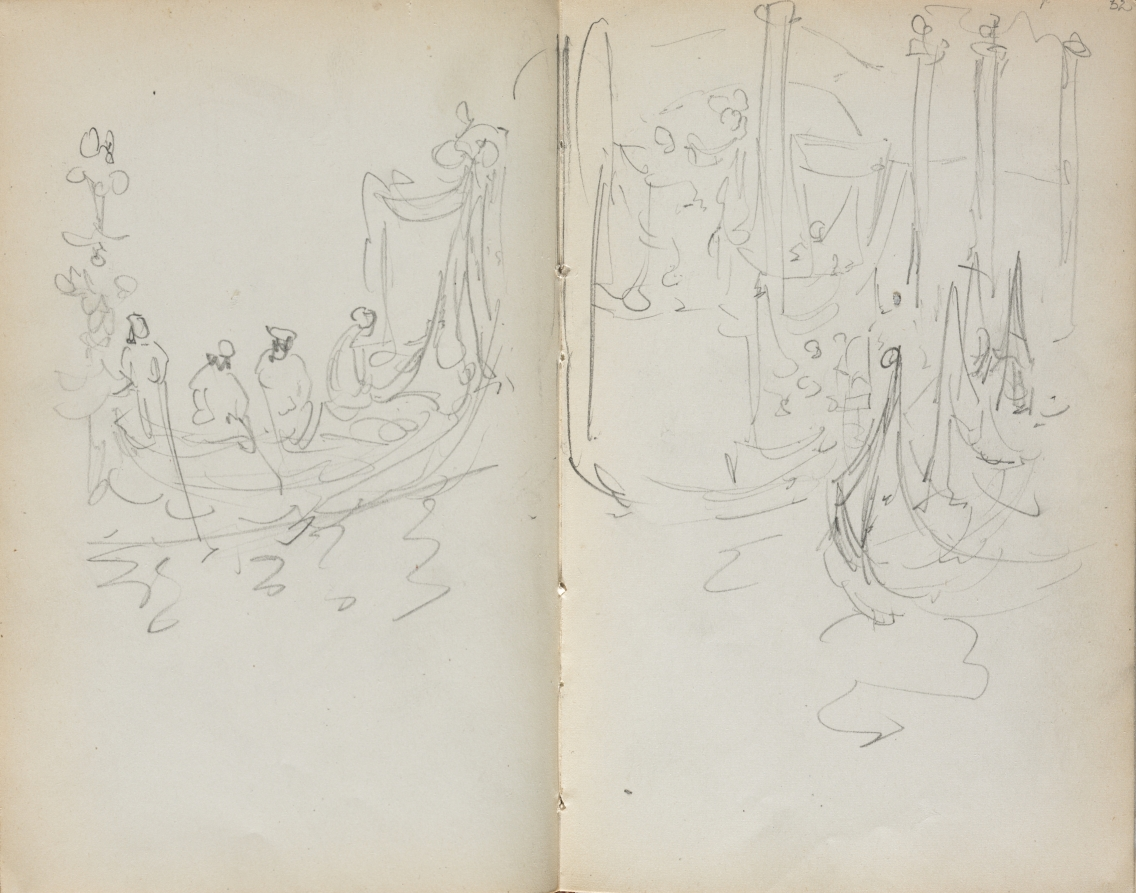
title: Italian Sketchbook: Venetian Harbor View (page 31 & 32)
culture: America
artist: Maurice Prendergast (American, born Newfoundland [now Canada], 1858–1924)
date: 1898–1899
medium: pencil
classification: Bound Volume